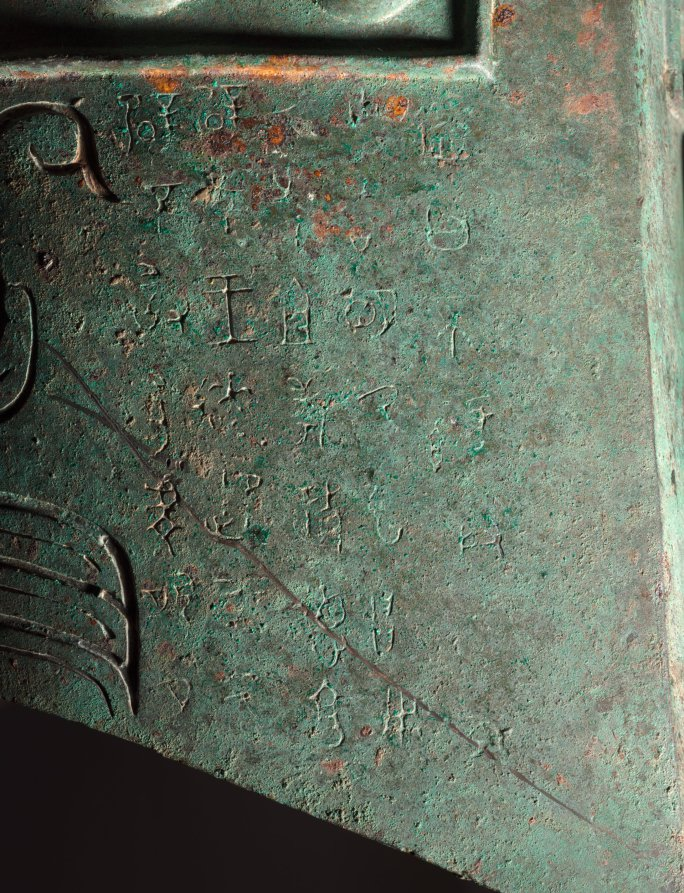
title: Bell (Lai Zhong)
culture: China, Shaanxi province, Meixian, Western Zhou dynasty (c. 1046–771 BCE)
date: c. 800–700 BCE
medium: bronze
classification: Metalwork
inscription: Lai proclaimed: "Great and illustrious was my august late father who made his heart clean following the disciplined virtue of his forefathers and dutifully served the past king. I, Lai, now succeed him in service and dare not fail. Respectfully, from dawn to dusk I will earnestly--even unto death--serve the Son of Heaven, taking as a model the obligation of my forefathers." I, Lai, was presented with many things. Then came the [king's] gracious command: "Manage the fisheries and forests of the realm." "I, Lai, dare to respond to the great, illustrious, sagely, and gracious favor of the Son of Heaven, extolling him and using this as cause to make for my august late father Gongshu a set of harmonized bells. Ding, dong, bing, bong, ding, dong, bing, bong. May they be used in acts of piety, reverently gladdening past luminaries. May the past luminaries who dwell on high help perpetuate this command, sending down upon me good fortune, tranquility, and purity. May I, Lai, live long in service to the Son of Heaven." May sons' sons and grandsons' grandsons forever treasure these [bells].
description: In ancient China, music and ritual had political significance and were linked inseparably to the power of states. During the Zhou dynasty, bronze bells were made in sets of eight to sixty bells. This bell is the second largest from a set of eight. This bell bears an inscription of 118 characters about its owner, Lai, and why it was cast. Lai's ancestors dutifully served the Western Zhou royal court, and he was granted a hereditary position by the "Son of Heaven" (the ruler). To express filial piety, Lai commissioned a set of bells as an offering to his father, Gongshu, in the hope that they would be forever treasured by future generations. This important inscription also provides an early example of Chinese calligraphy highlighting the purely abstract lines and construction of characters.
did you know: The technical sophistication of the unusual lens-shaped cavity allowed the bell to produce two different tones.